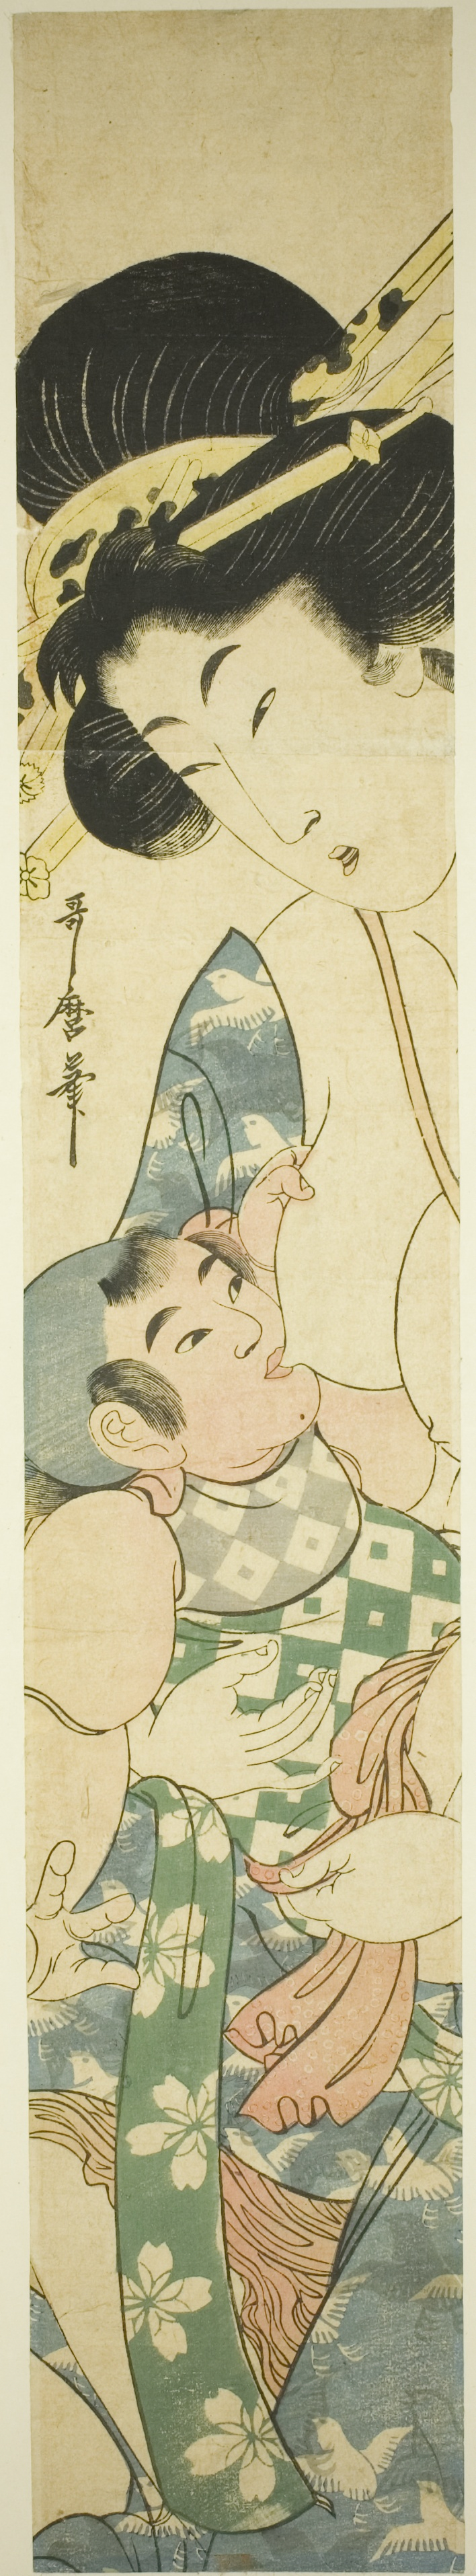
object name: Print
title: Mother Nursing Child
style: Japanese (culture or style)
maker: Kitagawa Utamaro II (Japanese, died 1831 (?))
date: c. 1806/31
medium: Color woodblock print; hashira-e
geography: Japan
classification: woodblock print; print; asian art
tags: mothers, babies, children, nursing (breast feeding)